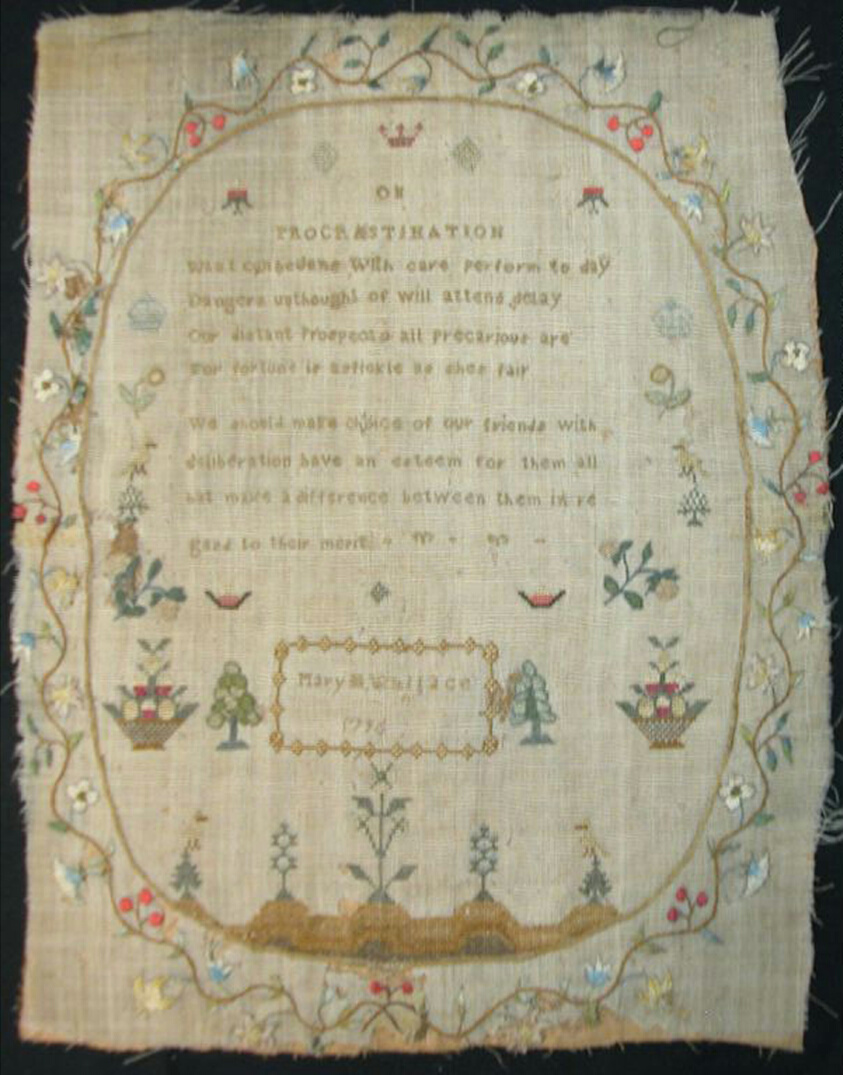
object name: Textile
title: Sampler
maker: Mary M. Wallace (active c. 1796); United States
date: 1796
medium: Tabby weave wool ground; embroidered in silk twist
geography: United States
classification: textile; needlework (visual works); sampler